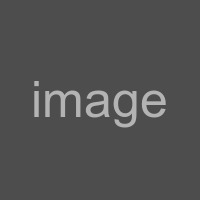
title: Agra. Diwan-i-Chas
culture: India, 19th century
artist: Photoglob Co. (Zurich, active c. 1890–1910)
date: 1890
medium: Photochrom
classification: Photograph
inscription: Imprinted in gold on recto in lower left corner: “20040. P.Z.-AGRA DIWAN-I-CHAS”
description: This Hall of Private Audiences was built by Shah Jahan, who commissioned the Taj Mahal. There, he and the succeeding Mughal emperors met with courtiers and important guests. Several men in European dress exit the hall, while men in native garb labor in the lush gardens. The tiny figures emphasize the building’s grand scale.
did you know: The rosy sky was an imaginative addition by the printers, as this print is based on a black-and-white photograph.